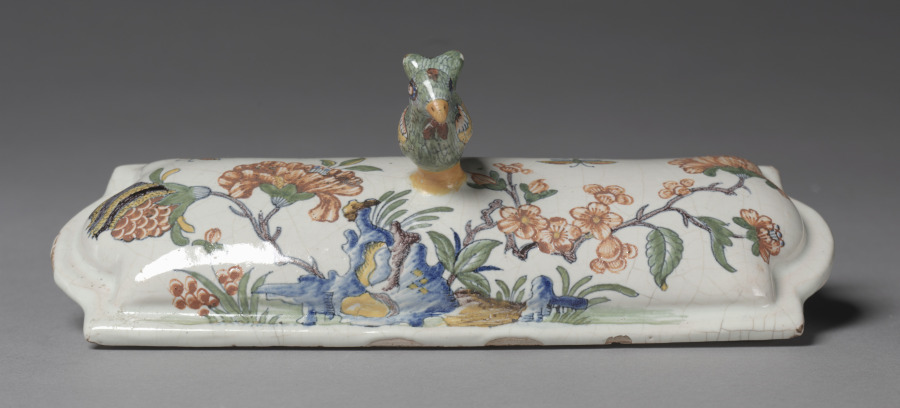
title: Lid from Writing Stand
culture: France, Sinceny, 18th century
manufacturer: Sinceny Factory (French)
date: 1746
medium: Tin-glazed earthenware (faience) with enamel decoration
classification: Ceramic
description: The faience factory at Sinceny was an offshoot of that at Rouen. In style, Sinceny closely resembles later Rouen wares with polychrome decoration. The stylized flowers and insects which decorate this writing stand are entirely typical of Sinceny faience.